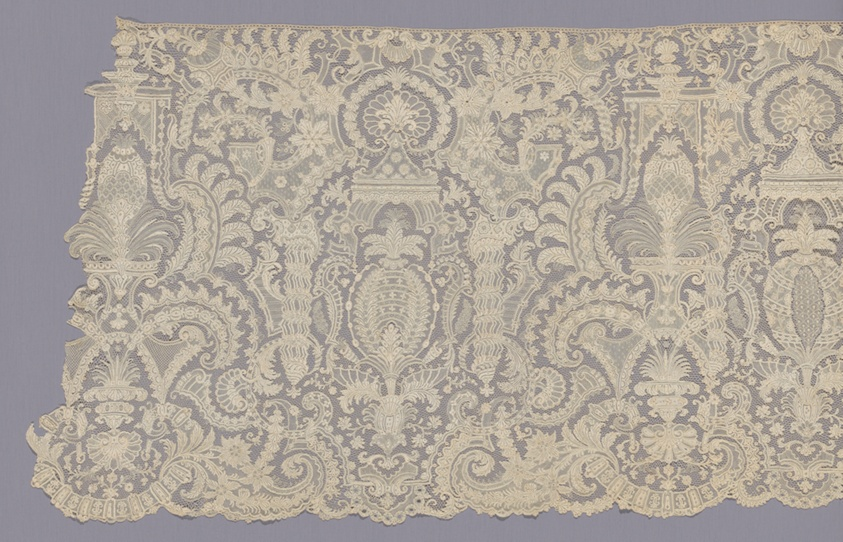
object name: Costume and Accessories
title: Flounce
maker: France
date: 1701/25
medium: Linen, needle lace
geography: France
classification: textile; lace - needle; costume component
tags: fashion, arabesque, cartouches, columns, pineapples